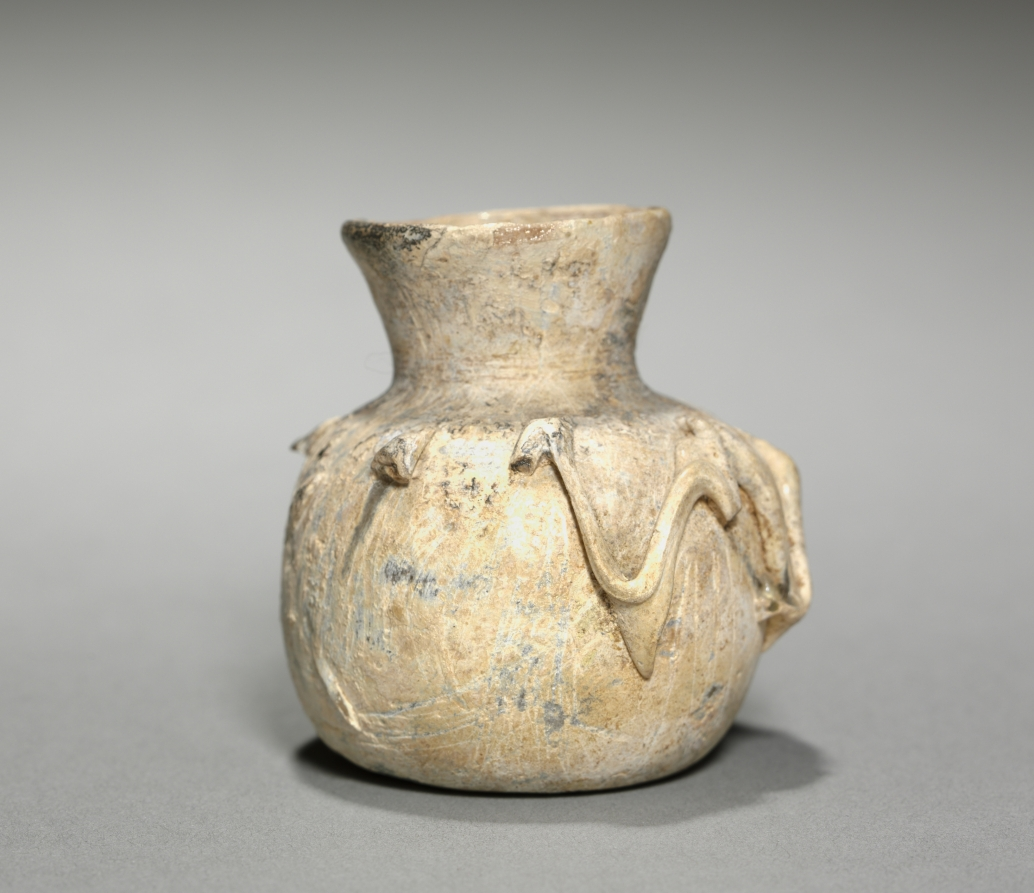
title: Vase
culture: Eastern Mediterranean, Roman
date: 200–500 CE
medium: glass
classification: Glass